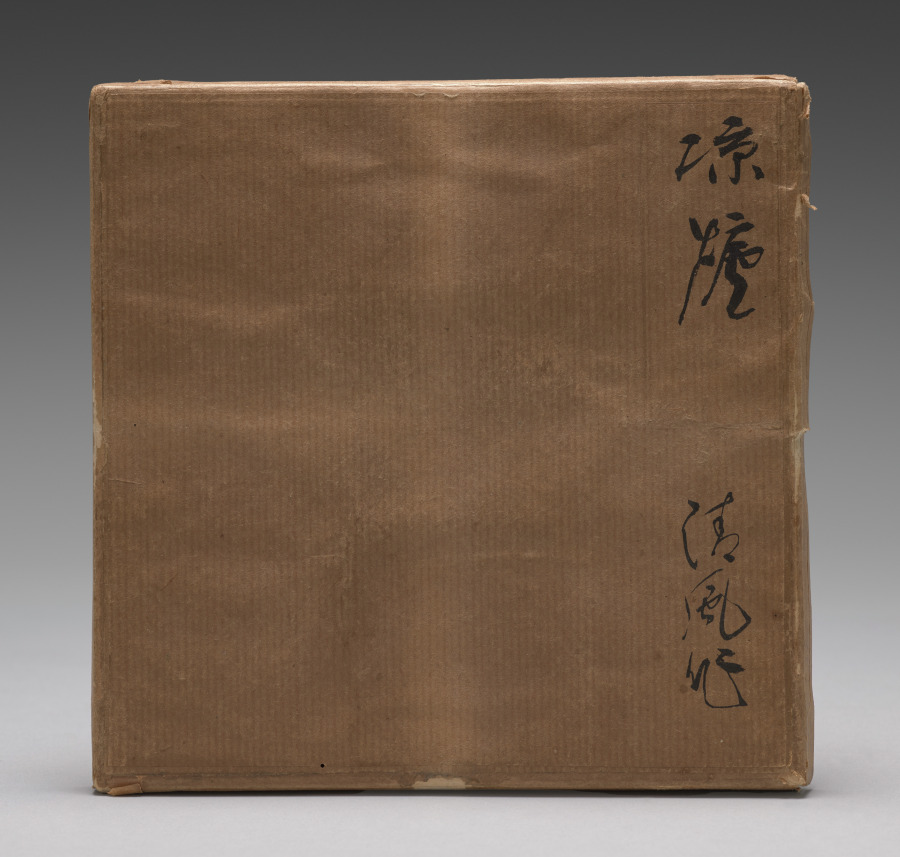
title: Brazier with Coins Motif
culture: Japan, Meiji period (1868–1912)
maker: Seifū Yohei III (Japanese, 1851–1914)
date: 1893–1914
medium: Stoneware with underglaze iron oxide designs and crackling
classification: Ceramic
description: Tall pottery braziers called ryōro are often used to heat the water for the tea served at sencha gatherings. This one sits on three sturdy legs, one of which bears the artist’s seal on its face. A horizontal rectilinear opening above this leg allows air to circulate into the lower part of the brazier. The top part is outfitted with three prongs onto which the kettle can be lowered; below them is a basin, perforated with circular holes, that holds the charcoal fuel. The brazier is decorated under the crackled transparent glaze with a design of old coins in iron oxide. The motif is cleverly chosen, for most older coins are round with a central hole, often square, which echoes the cylindrical form of the brazier with its rectilinear “wind gate,” or fūmon.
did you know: One coin is painted with the Japanese god of wealth, Daikokuten, standing upon two bales of rice.